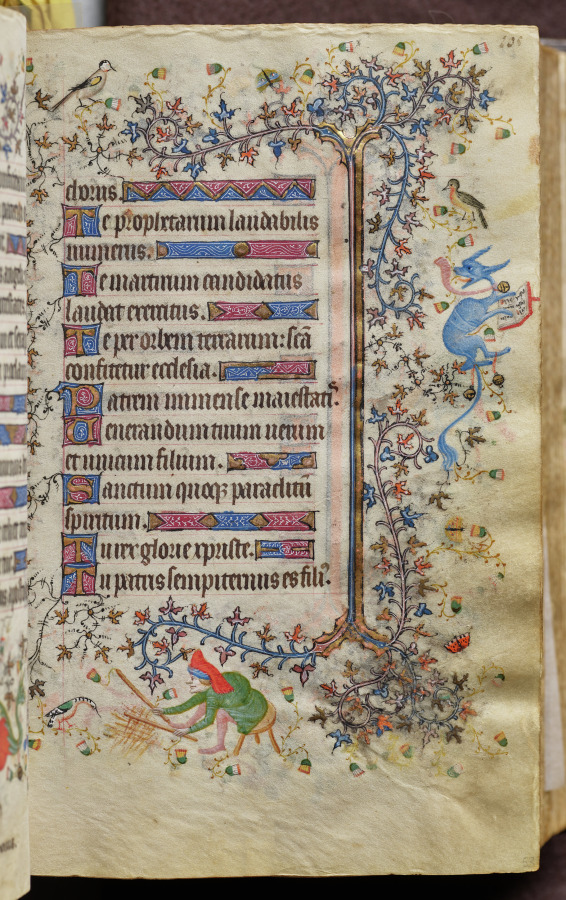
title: Hours of Charles the Noble, King of Navarre (1361-1425): fol. 53r, Text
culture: France, Paris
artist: Master of the Brussels Initials and Associates (French)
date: c. 1405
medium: ink, tempera, and gold on vellum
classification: Bound Volume